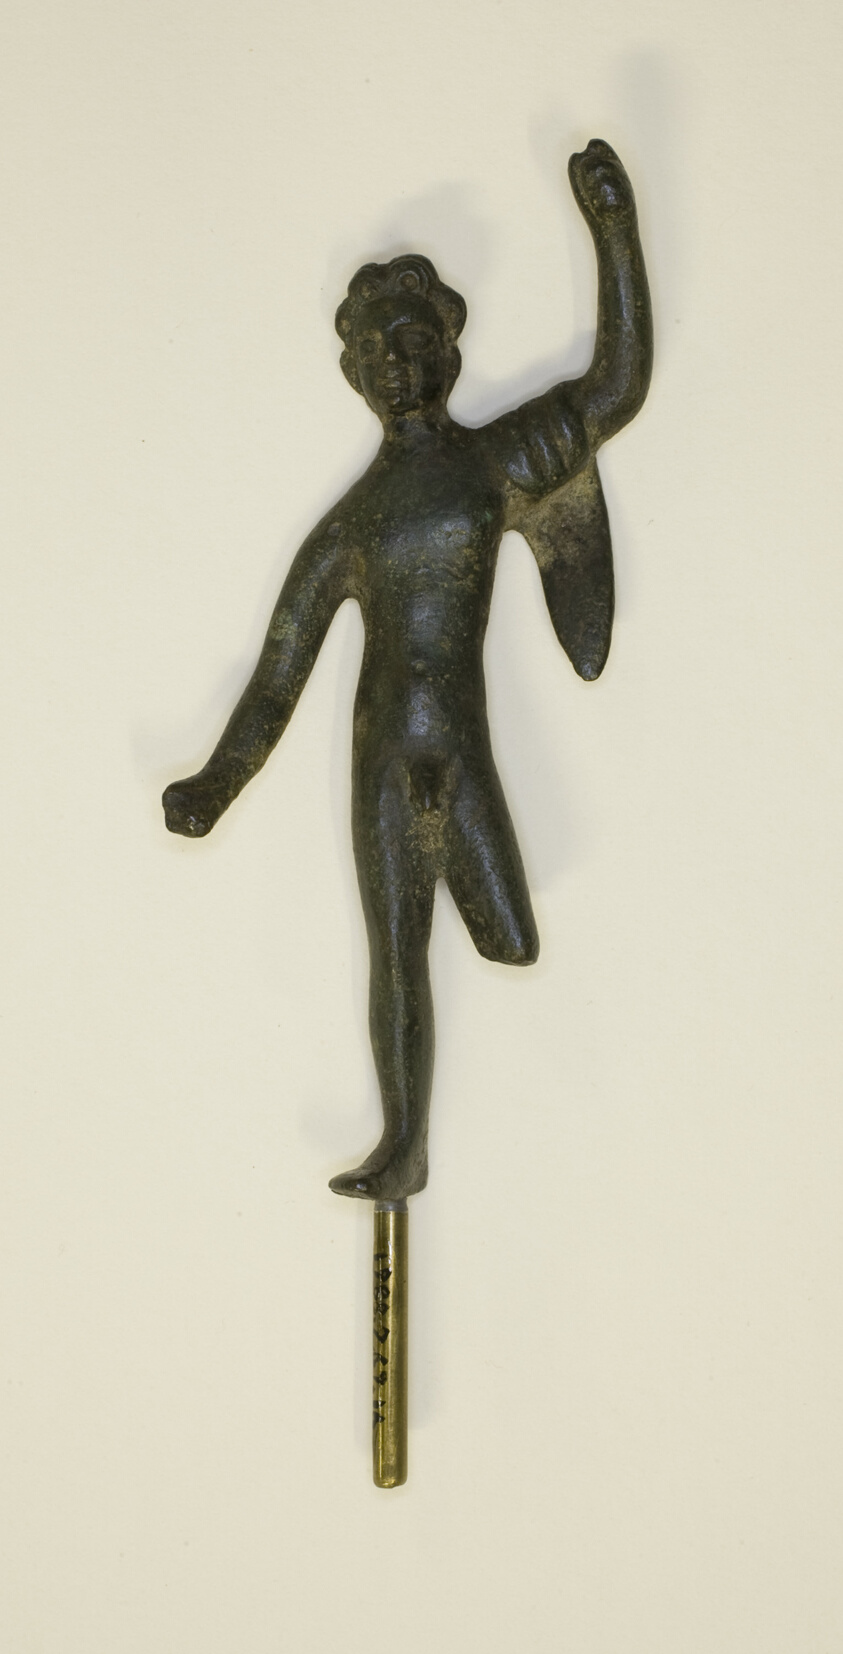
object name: Sculpture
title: Statuette of Herakles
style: etruscan, ancient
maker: Etruscan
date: 4th-3rd century BCE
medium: Bronze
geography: Etruria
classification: statuette; bronze; metal; sculpture; ancient art